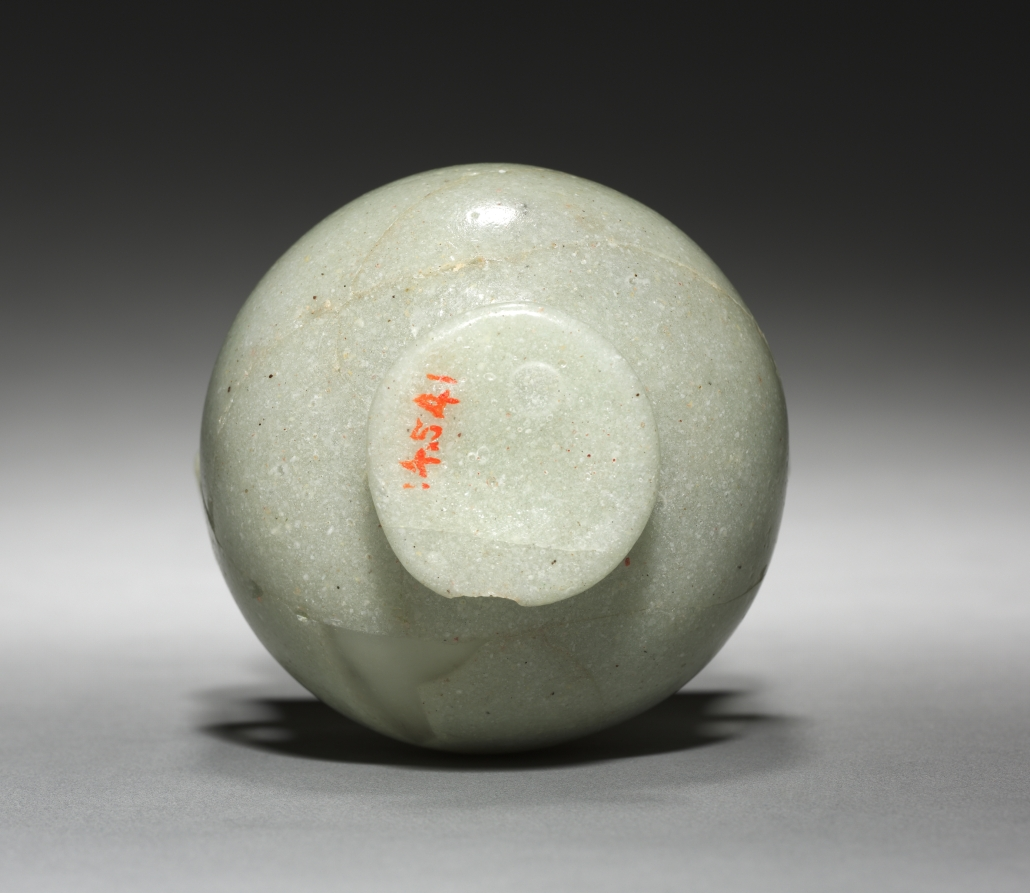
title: Unguent Bottle (Krateriskos)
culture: Egypt, New Kingdom (1540–1069 BCE), Dynasty 18, post-Amarna period or later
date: c. 1336–1295 BCE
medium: glass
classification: Vessels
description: This was probably the most popular type of Egyptian glass vessel. The milky white to sea green-colored fabric and monochrome decorative scheme are reminiscent of Egyptian alabaster. That the Egyptians would make an association between glass and stone is only natural, as the Egyptian name for glass was inr n(y) wdh or "the flowing stone."